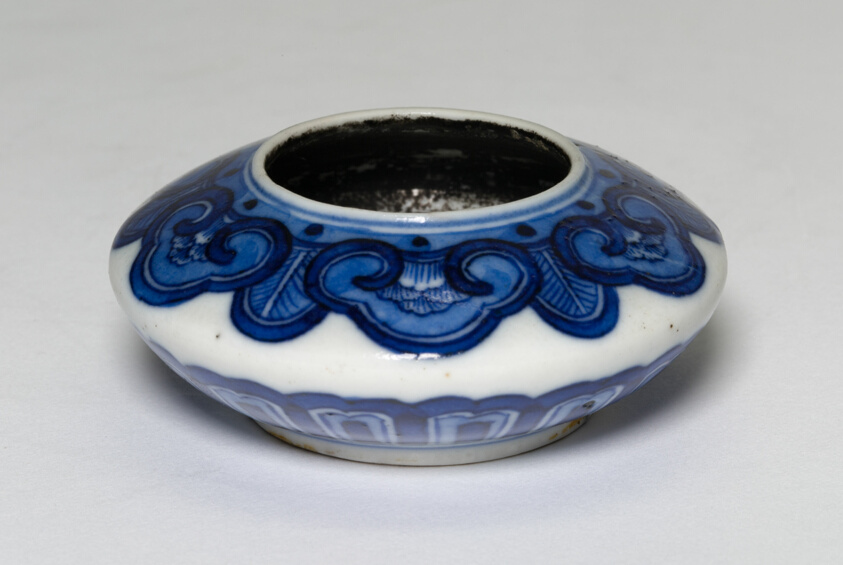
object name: Vessel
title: Coupe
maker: China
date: Qing dynasty (1644–1911), Qianlong period (1736–1795)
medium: Porcelain painted in underglaze blue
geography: China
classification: porcelain; asian art; ceramics